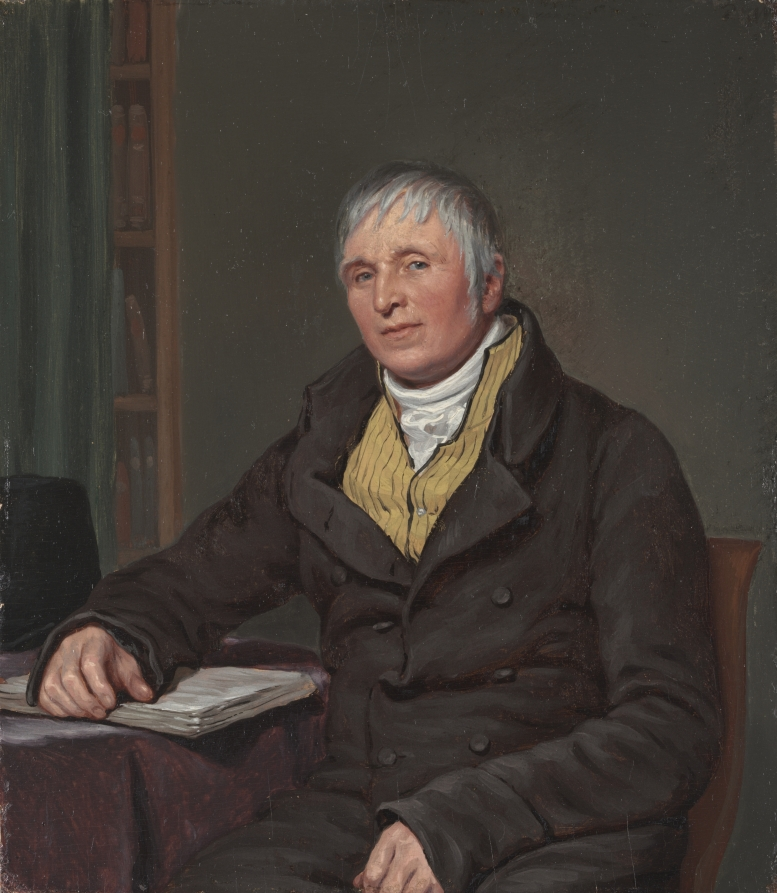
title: Charles Thompson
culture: Netherlands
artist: Pieter Christoffel Wonder (Dutch, 1780–1852)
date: c. 1818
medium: oil on wood panel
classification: Painting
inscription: Signed in black, upper right: P.[loss].W[?].